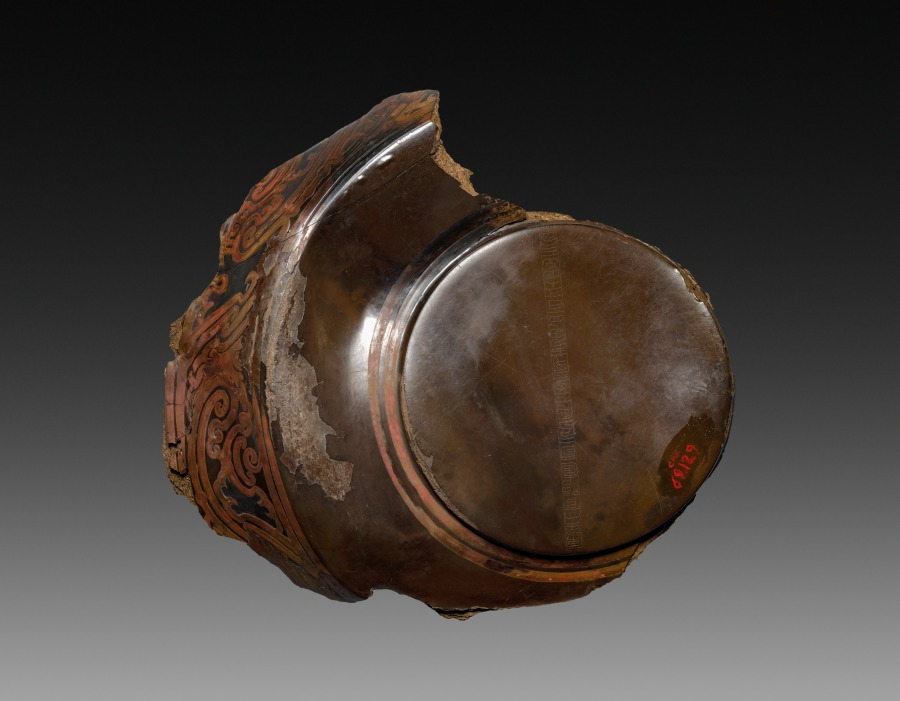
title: Fragment of a Lacquer Tray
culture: China, excavated at Lolang, Xin dynasty (9–23 CE)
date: 9 CE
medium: lacquer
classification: Lacquer